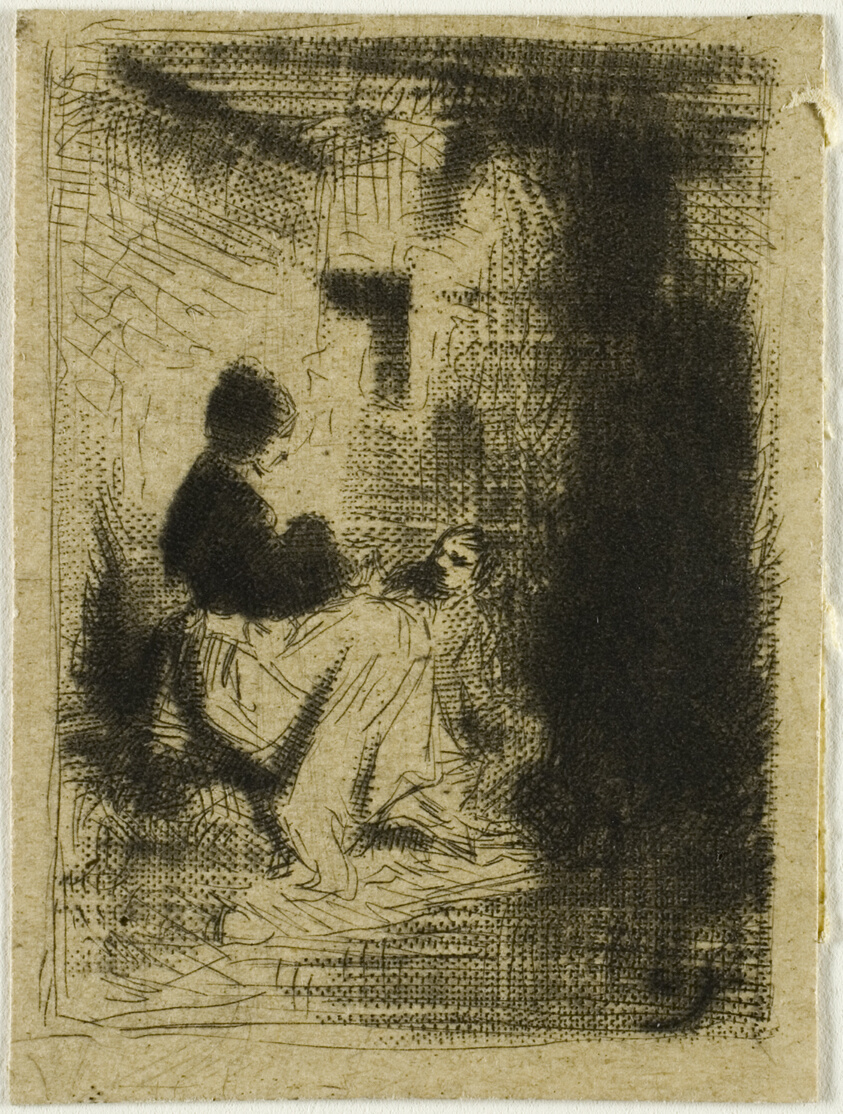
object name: Print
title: A Woman and her Child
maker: Charles Émile Jacque (French, 1813-1894)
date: 1843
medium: Drypoint and roulette on cream laid paper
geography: France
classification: drypoint; print; prints and drawing